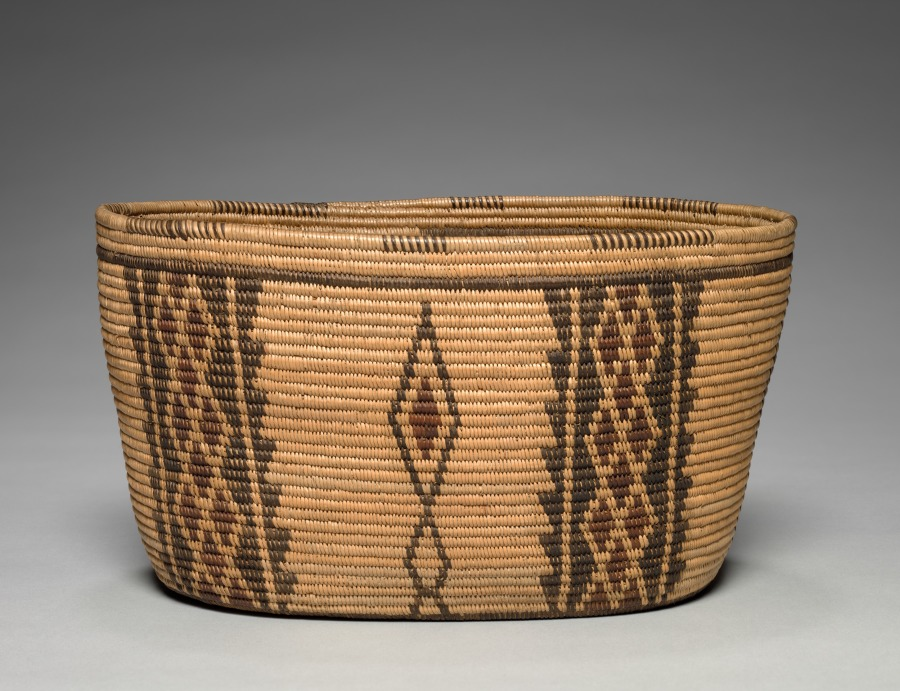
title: Bowl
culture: Great Basin, Timbisha Shoshone (Panamint)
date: c 1900–1910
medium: willow, devil's claw, yucca root; coiled (3 rods)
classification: Basketry